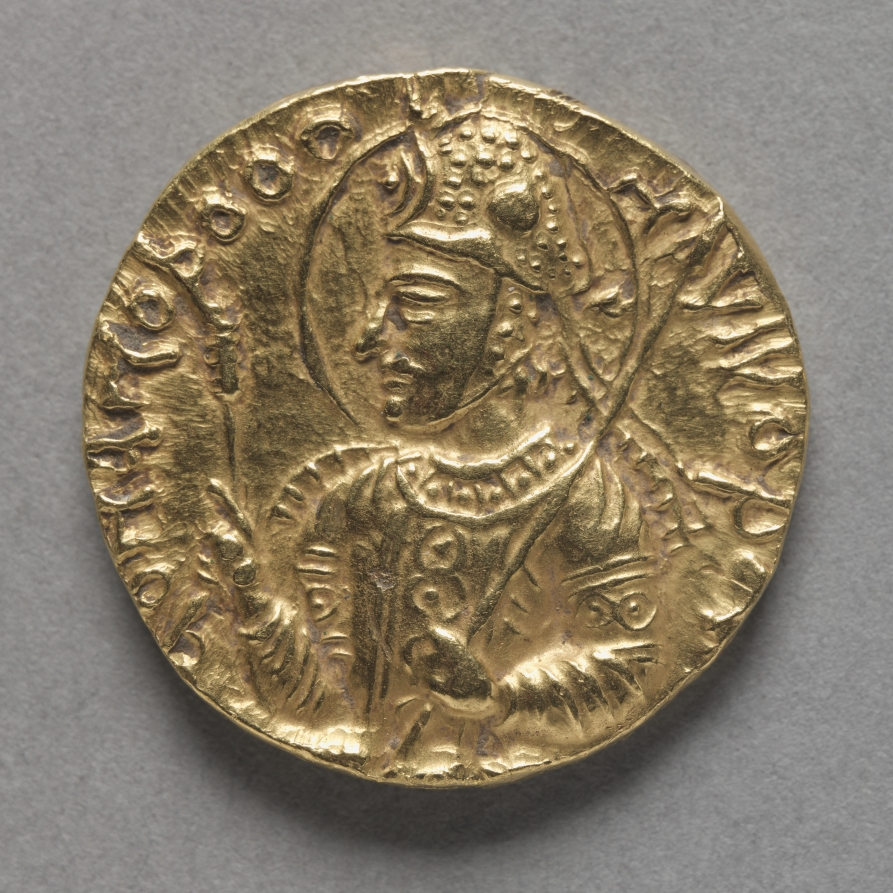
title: Coin: Havishka (obverse)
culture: India, Mathura, Kushan period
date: c. 106–149 CE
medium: gold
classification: Coins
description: This gold coin represents the reign of the Kushana ruler, Havishka. The coin bears a portrait of the ruler on the obverse and various deities on the reverse. It is identified by inscriptions in Kharosthi, the language used in northwestern India during the Kushan period.